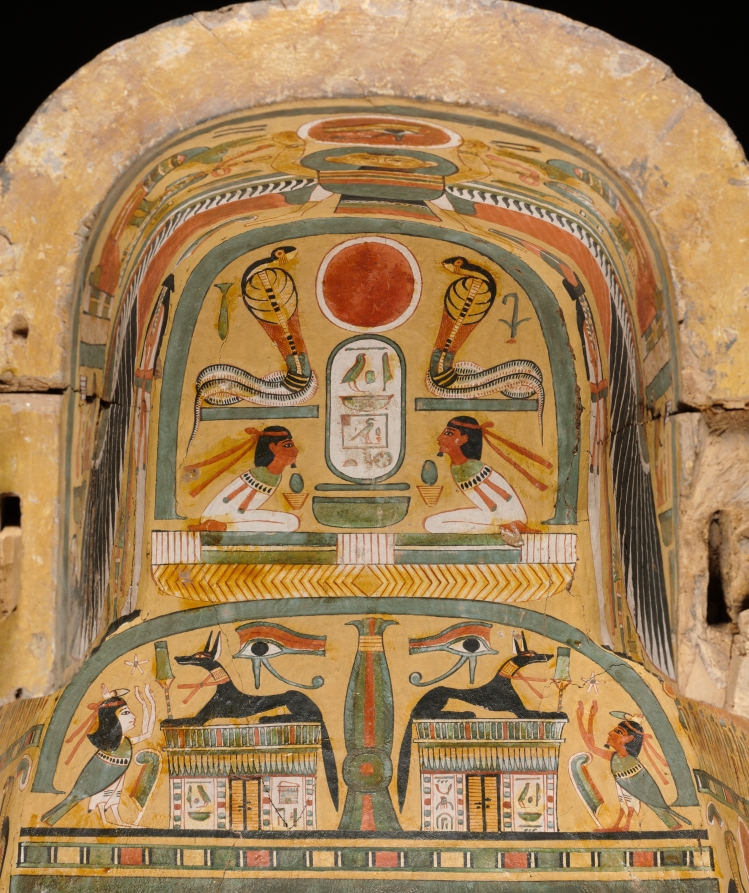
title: Coffin of Nesykhonsu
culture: Egypt, Thebes, Third Intermediate (1069–715 BCE), Dynasties 21–22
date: c. 976–889 BCE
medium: gessoed and painted sycamore fig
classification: Funerary Equipment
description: Egyptian coffins told stories and illustrated spells to help the deceased transition safely to the afterlife. Inside Nesykhonsu's coffin there are two jackals, one facing right and the other left, near the top. Here, the jackal represents the powerful deity Anubis, the god of the afterlife and embalming.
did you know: Two of Nesykhonsu's titles, "Lady of the House" and "Singer of the Choir of Mut the Great," are written on the outside of the coffin.